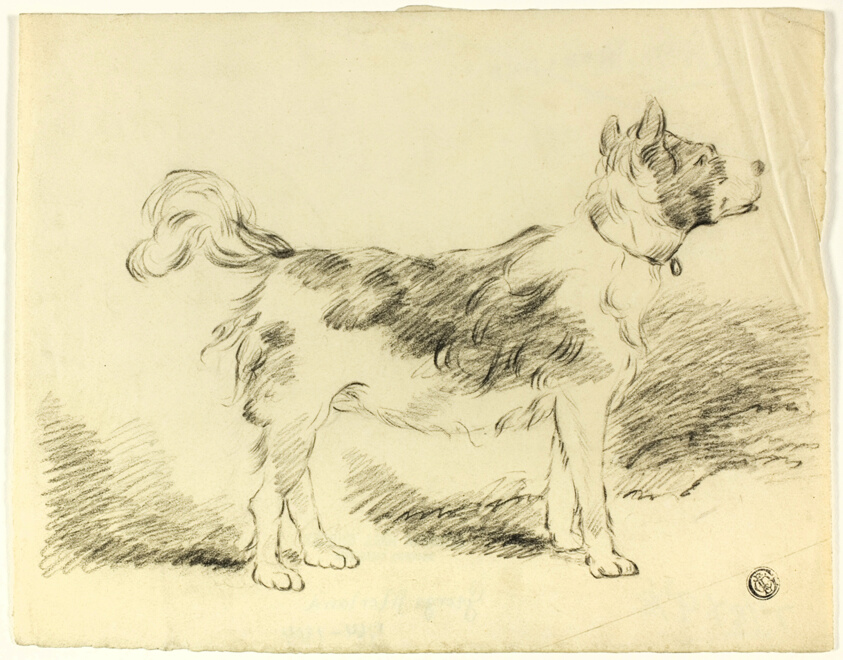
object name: Drawing and Watercolor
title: Shepherd Dog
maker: After George Morland; English, 1763-1804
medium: Black chalk on cream wove paper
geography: England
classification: chalk; drawings (visual works); prints and drawing